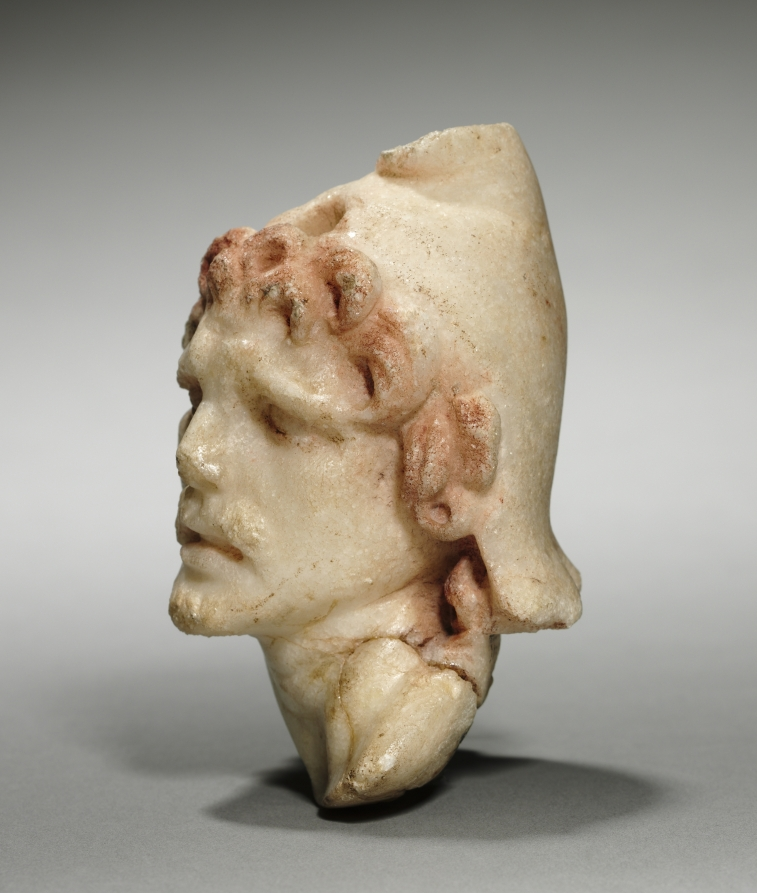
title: Head of a Foreign Warrior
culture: Greece, Alexandria or the Levant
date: 300–200 BCE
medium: marble with traces of paint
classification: Sculpture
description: This miniature head depicts a man with wild curls that still retain their original red pigment. He is immediately revealed as a non-Greek by his carved mustache, associated with Celtic tribes, and cone-shaped hat called a Phrygian cap, associated with eastern peoples such as the Persians. During the Hellenistic period, various non-Greek peoples served as mercenaries or fought against the Greek kingdoms, and these foreign warriors were depicted extensively in art.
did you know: There is a small notch below the cap's crest that likely held an attachment, now lost.